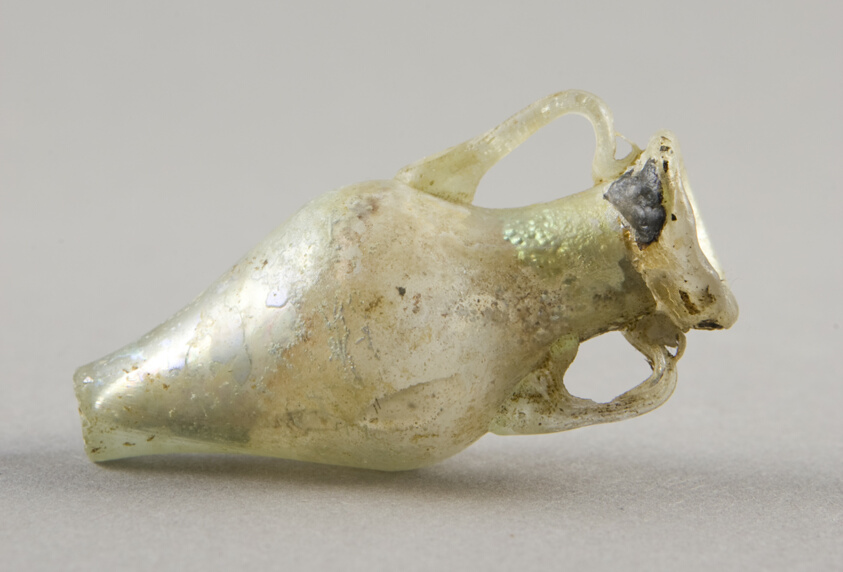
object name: Vessel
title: Amphoriskos (Container for Oil)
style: ancient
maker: Ancient Mediterranean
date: 6th-5th century BCE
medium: Glass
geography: Mediterranean Region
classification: glass; vessel; ancient art